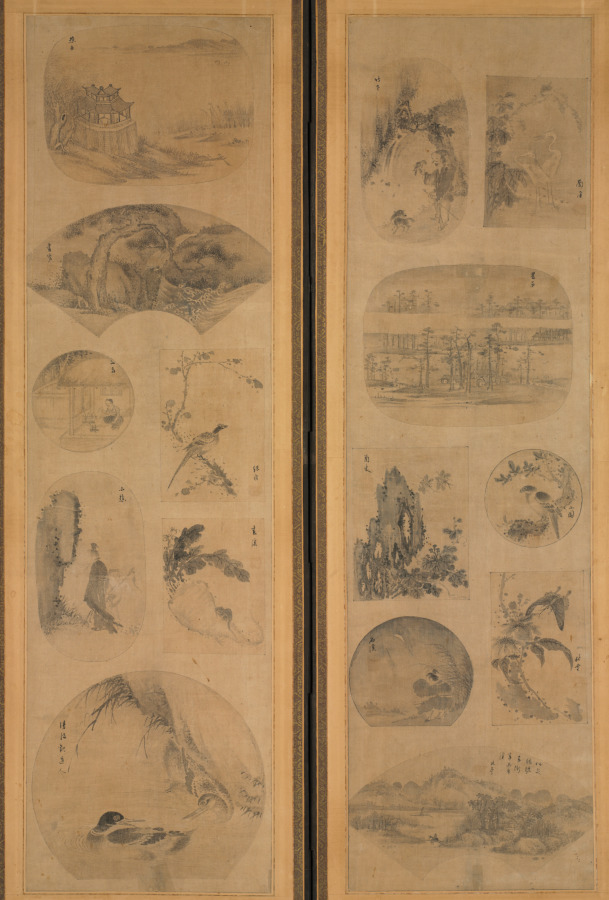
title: Painting of One Hundred Themes (obverse)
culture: Korea, Joseon dynasty (1392–1910)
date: late 1800s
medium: Ten-panel folding screen affixed with album leaves (obverse), calligraphy (reverse), ink and color on silk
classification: Painting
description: This screen depicts paintings on one side and poems on the other—an economical format often used in Korea to allow the viewer to enjoy both sides of one screen. The front features an assortment of bird-and-flower, landscape, and figural paintings executed according to the brush manner of more than 50 artists. A calligrapher has brushed several Chinese poems about the four seasons on the reverse side, among them "Composing in the Daytime of Summer" by Tang poet Liu Zongyuan (773–819) and "Composing when Spring Begins" by Song scholar Zhang Shi (1133–1180).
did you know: Depicting small images of various subjects became one of the most popular types of painting toward the end of the 19th century.